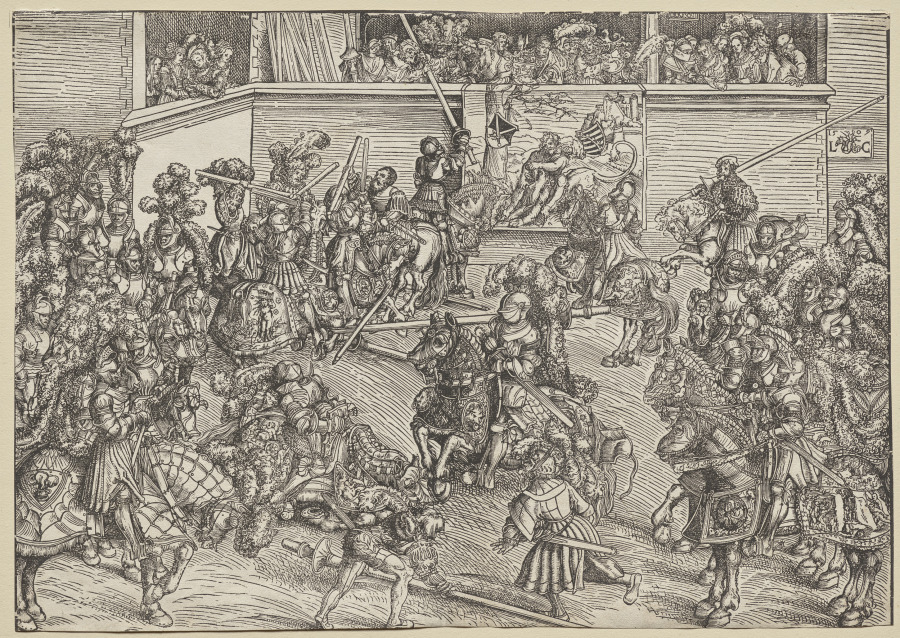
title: The Tournament with Sampson and the Lion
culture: Germany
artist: Lucas Cranach (German, 1472–1553)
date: 1509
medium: woodcut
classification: Print